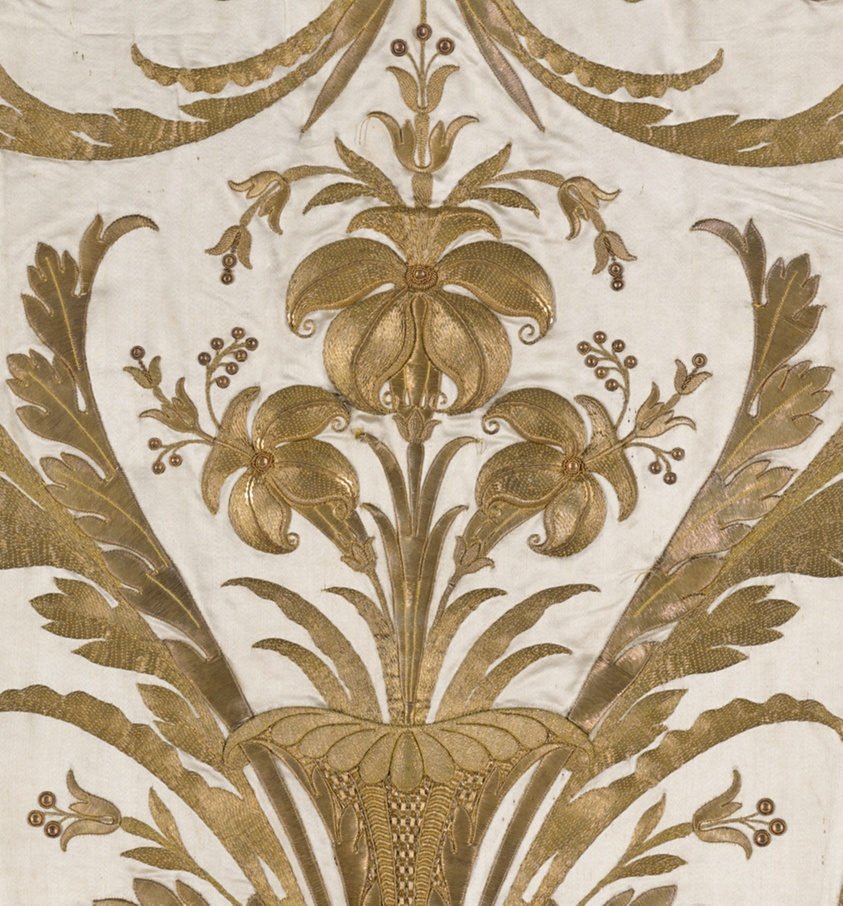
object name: Costume and Accessories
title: Skirt from a Court Gown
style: 19th century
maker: France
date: 1805-15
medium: Silk, satin weave; embroidered with gold metal-wrapped over a silk fibre core, gold frisé, silk, gold metal formed ornaments, "purl," spangles, gold metal strips; couching over paper core and silk padding, in pattern and backstitch; trimmed with bobbin lace made of gold metal strip wound around a silk fibre core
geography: France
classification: textile; needlework (visual works); costume; costume - embroidery; skirt (garment)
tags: lilies, flowers